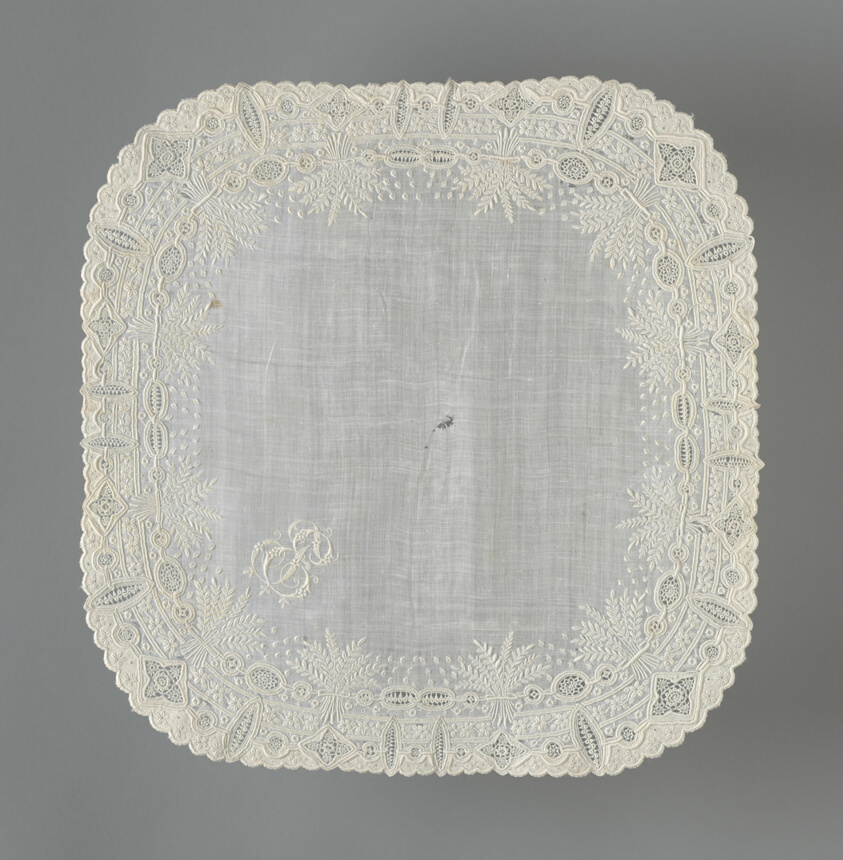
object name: Textile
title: Handkerchief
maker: France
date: 1850/1900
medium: Linen, plain weave; embroidered with cotton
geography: France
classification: textile; needlework (visual works); accessories (object genre); weaving